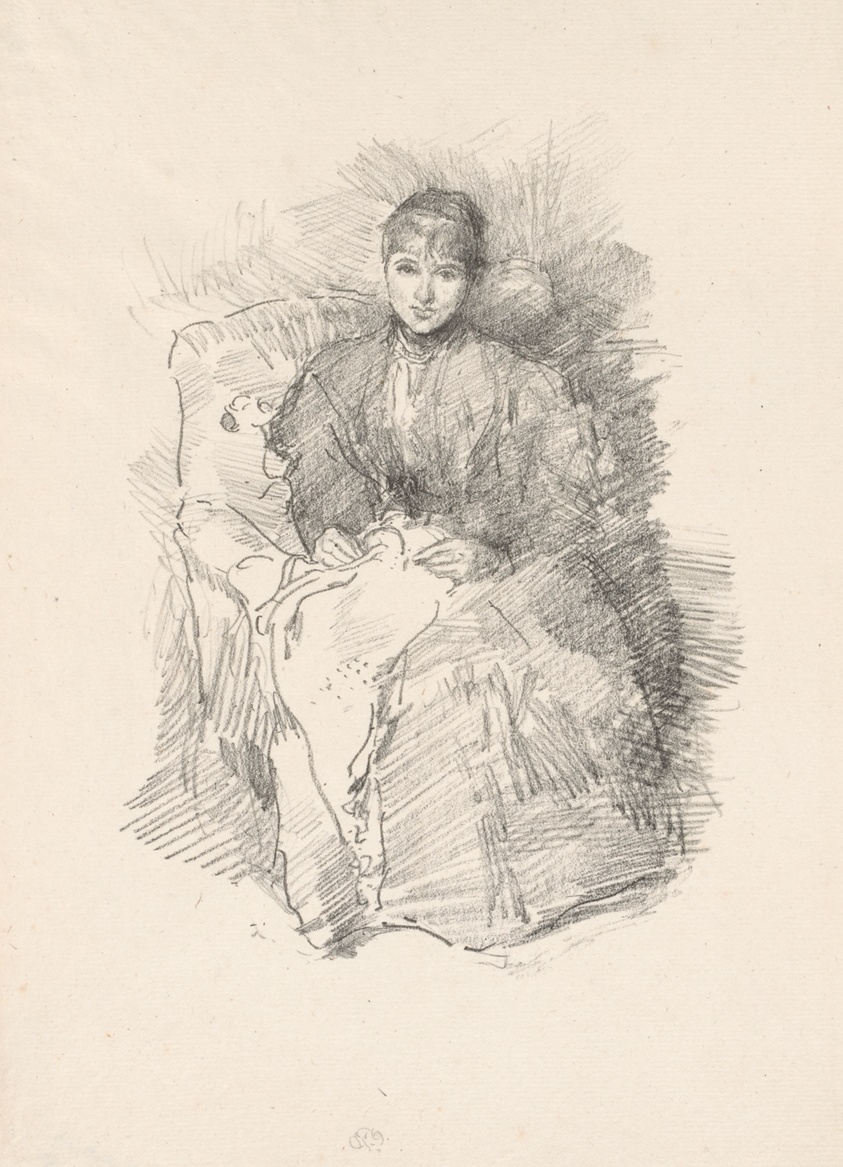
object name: Print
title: Needlework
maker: James McNeill Whistler (American, 1834-1903)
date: 1896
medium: Transfer lithograph in black on ivory laid paper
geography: United States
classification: transfer lithograph; lithograph; print; prints and drawing; paper